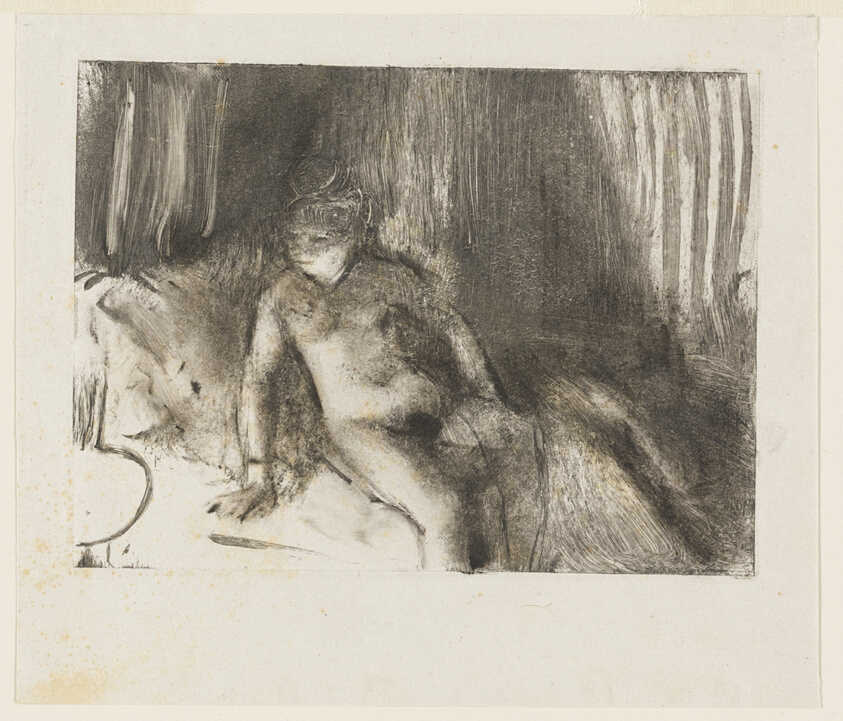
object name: Print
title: Waiting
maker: Edgar Degas; French, 1834-1917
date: c. 1879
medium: Monotype in blackish-brown ink on grayish-ivory china paper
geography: France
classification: monotype; print; prints and drawing; paper